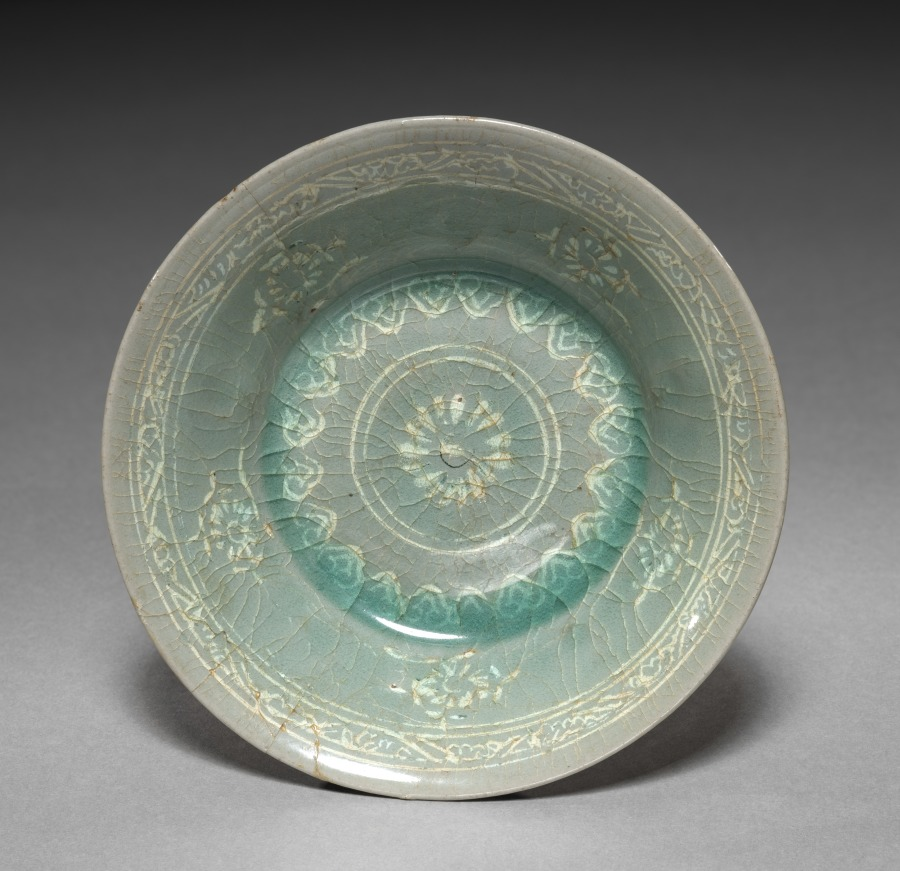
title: Dish with Inlaid Chrysanthemum Design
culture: Korea, Goryeo dynasty (918–1392)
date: 1200s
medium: ceramic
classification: Ceramic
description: Celadon wares used for everyday such as this dish were among the most common burial objects in tombs during the Goryeo period (918–1392). Furnishing tombs with an elaborate assemblage of objects was believed to honor and comfort the newly dead. Generally, Goryeo tombs were left untouched until the late 1800s. During the colonial period (1910–45), however, Japanese archaeologists competitively excavated the tombs located in Kaeseong, the former capital of the Goryeo period, and these wares soon became available for Japanese and Western collectors.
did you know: On the base of this tea bowl, three small spur marks made of bits of clay remain visible, indicating an individual protective casing of fire clay (saggar).